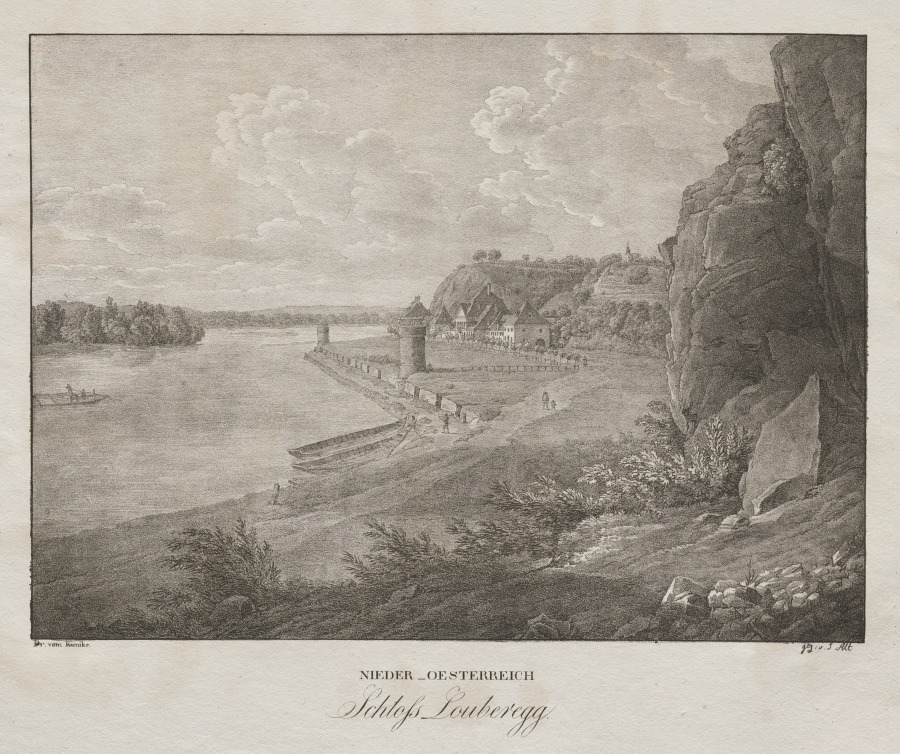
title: Nieder-oesterreich, Schloss Louberegg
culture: Austria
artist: Jakob Alt (Austrian, 1789–1872)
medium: lithograph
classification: Print